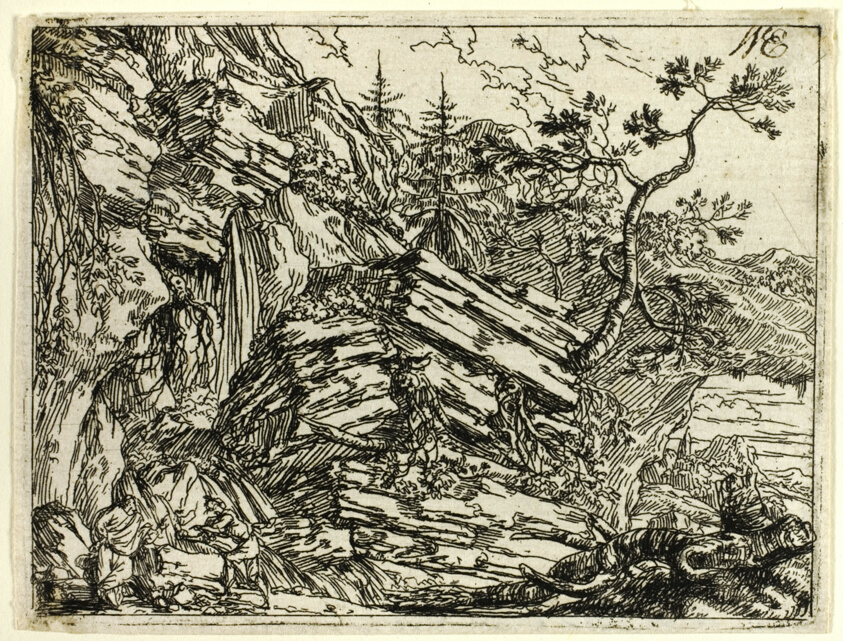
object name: Print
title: Italian Landscape with Ruins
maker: Jonas Umbach the Elder; German, 1624-1693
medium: Etching in black on ivory laid paper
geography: Germany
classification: etching; print; prints and drawing